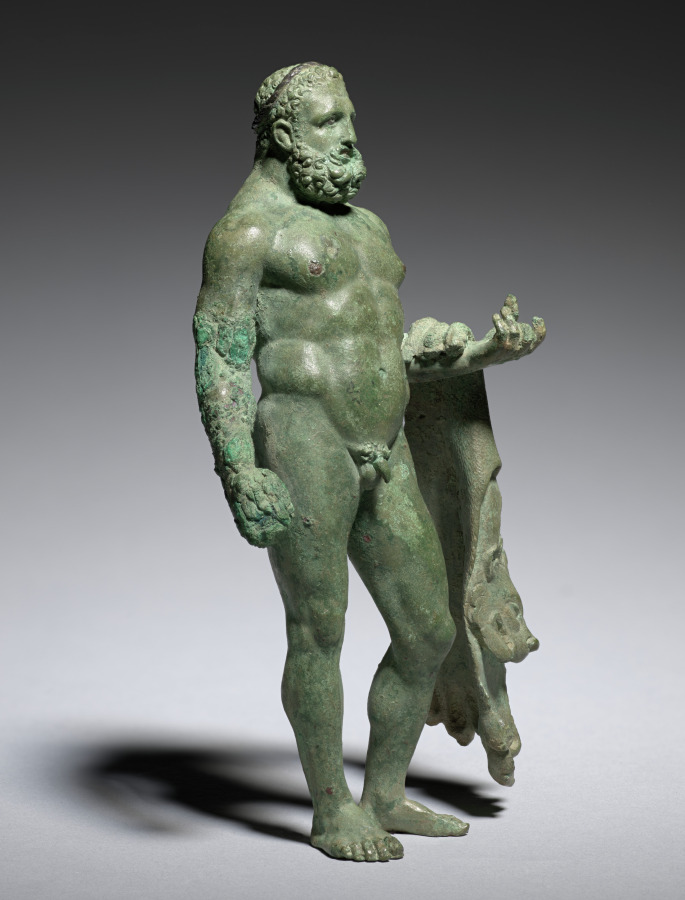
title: Hercules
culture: Italy, Rome, Early Imperial period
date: c. 30 BCE–20 CE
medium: bronze with silver and copper inlays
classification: Sculpture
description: This bronze statuette is a nude figure of the hero Hercules. He stands in a contrapposto pose, with the majority of his weight on one leg. Over his left arm, Hercules holds the skin of the Nemean Lion, having slayed the beast as part of his Twelve Labors and now carrying the pelt as a trophy. Although now mostly lost, Hercules once held his signature wooden club in his right hand. Roman artists often portrayed Hercules as middle-aged, as though greater maturity would increase his power and virility.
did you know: Hercules is the Roman name for the classical hero known in Greek as Herakles.